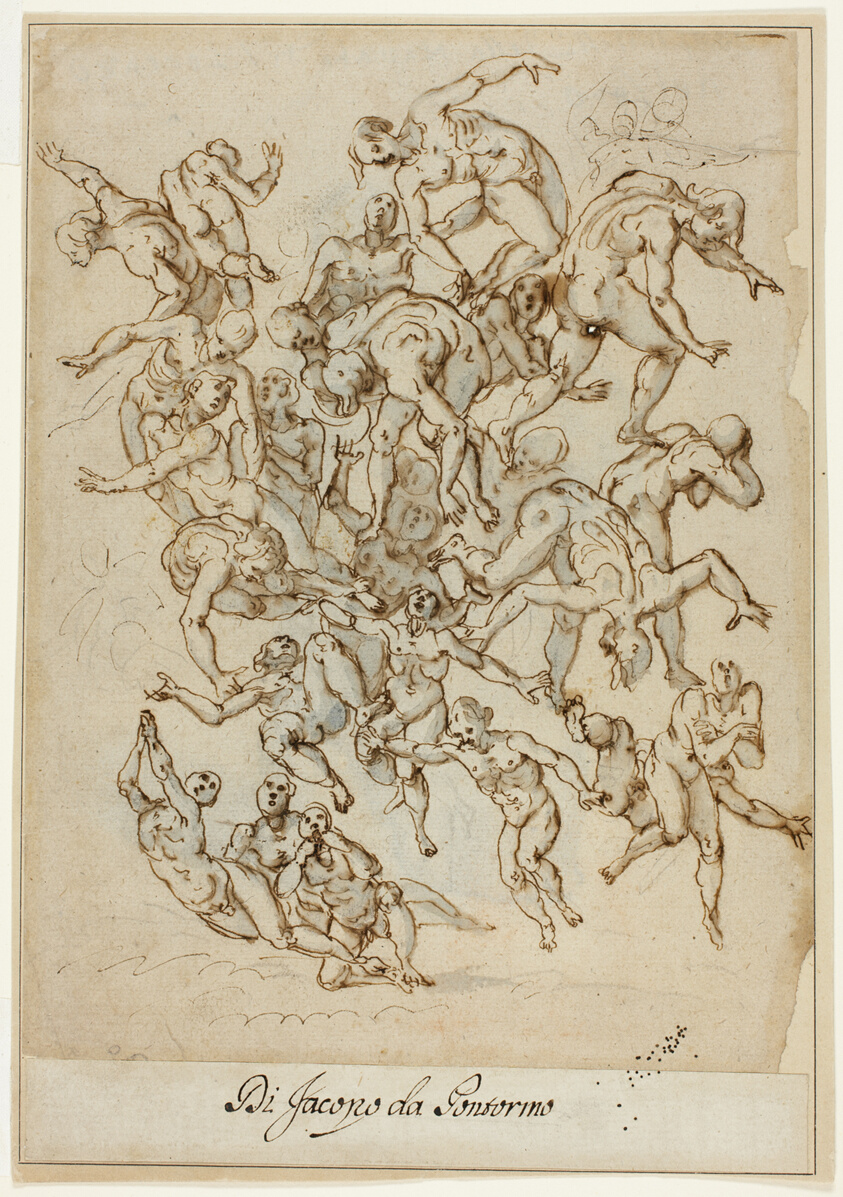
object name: Drawing and Watercolor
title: Fall of the Damned (recto) Male Torso (verso)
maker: Circle of Ludovico Cardi, called Il Cigoli; Italian, 1559-1613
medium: Pen and brown ink with brush and blue wash over black chalk, on tan laid paper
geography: Italy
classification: pen and ink drawings; drawings (visual works); prints and drawing